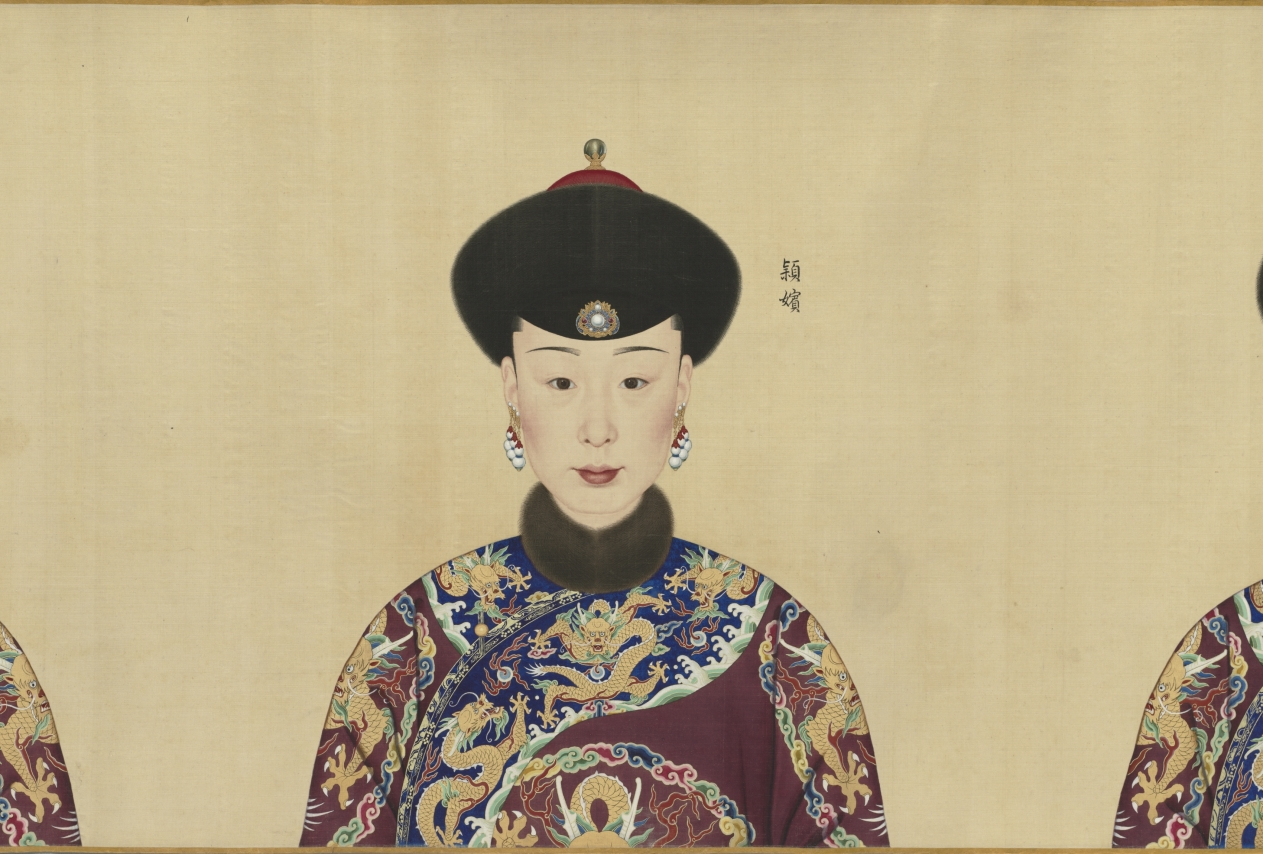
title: Portraits of the Qianlong Emperor and His Twelve Consorts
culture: China, Qing dynasty (1644–1911), Qianlong reign (1736–95)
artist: Giuseppe Castiglione (Italian, 1688–1766)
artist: and others (Chinese)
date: 1736–70s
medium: Handscroll; ink and color on silk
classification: Painting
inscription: 9 seals of the Qianlong emperor (r. 1736–95).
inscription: The eighth month, first year of Qianlong [1736] 乾隆元年八月吉日. The Empress (Xiaoxian) 皇后 (1712–1748), The Guifei (Huixian) 貴妃 (?-–1745), Chunfei 純妃 (1713–1760), Jiafei 嘉妃 (?–1755), Lingfei 令妃 (1727–1775), Shufei 舒妃 (1728–1777), Qingbin 慶嬪 (1724–1774), Yingbin 穎嬪 (1731–1800), Xinbin 忻嬪 (?–1764), Dunfei 惇妃 (1746–1806), Xunfei 順妃 (1749–1788), Shunbin 循嬪 (?–1797).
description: This portrait shows the Qianlong emperor at 26, in the first year of his reign. His likeness is followed by portraits of the empress and eleven consorts. Their portraits document the appearances of the court women around the time when they received their respective imperial titles, which occurred at different stages of the emperor's life. The first three portraits were done by the Jesuit (Roman Catholic) missionary artist Giuseppe Castiglione, whereas the later ones were by Chinese court painters. Formal portraiture contributed to the affirmation of status and construction of role and identity. This scroll served as both familial documentation and a "mind picture" of the Qianlong emperor, suggesting that his constructed image of emperorship was inseparable from concepts of self and family. It was stored in a carved red lacquer box bearing the original painting title Mind Picture of a Well-Governed and Tranquil Reign (see CMA 1969.32).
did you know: Lingfei 令妃 (1727–1775), the first consort depicted in the maroon or “incense-colored" 香色 robe, was the mother of six of Qianlong’s children, including the future Emperor Jiaqing.